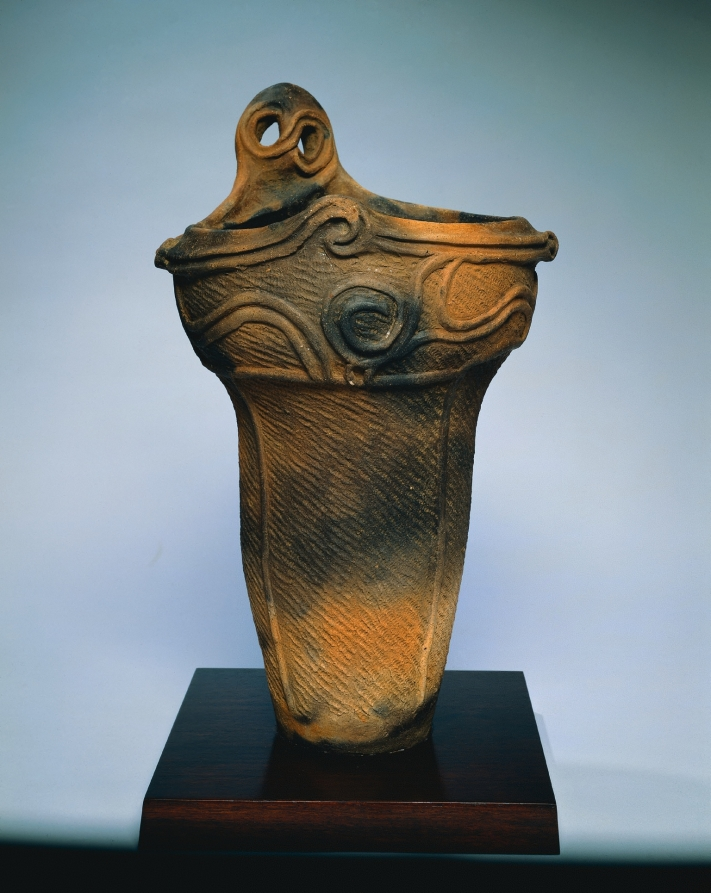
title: Cooking Vessel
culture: Japan, Jōmon period (c. 10,500–300 BCE)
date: c. 2500 BCE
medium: earthenware with impressed and applied designs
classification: Ceramic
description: This asymmetrical vessel has designs made by pressing cord or rope onto the damp clay and cylinders of clay applied to the surface. Based on its designs and shape, it was likely produced in the northern Kanto region. For reasons unknown today, different regions created signature styles.